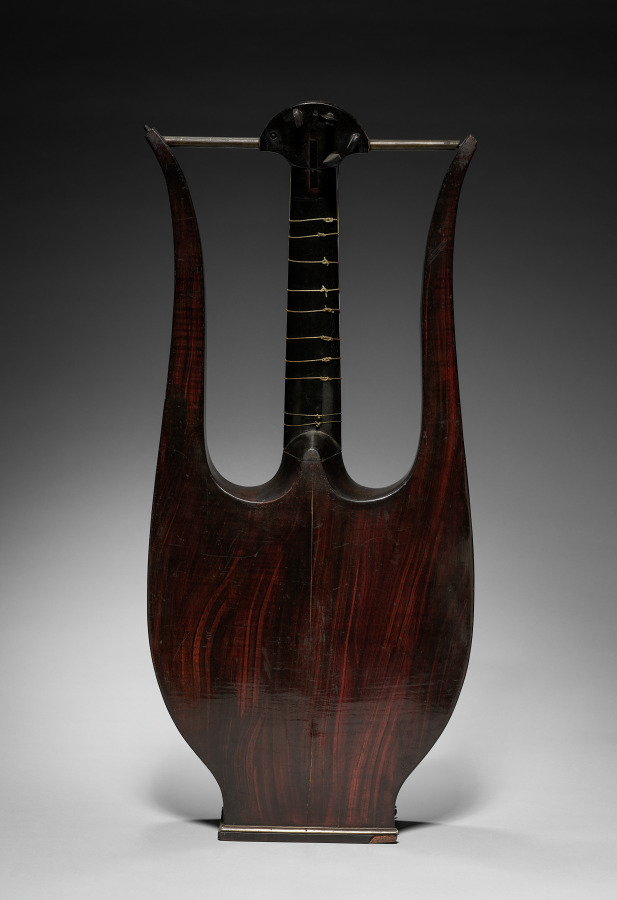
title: Lyre Guitar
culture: Italy, late 17th century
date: late 1600s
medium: wood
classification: Musical Instrument